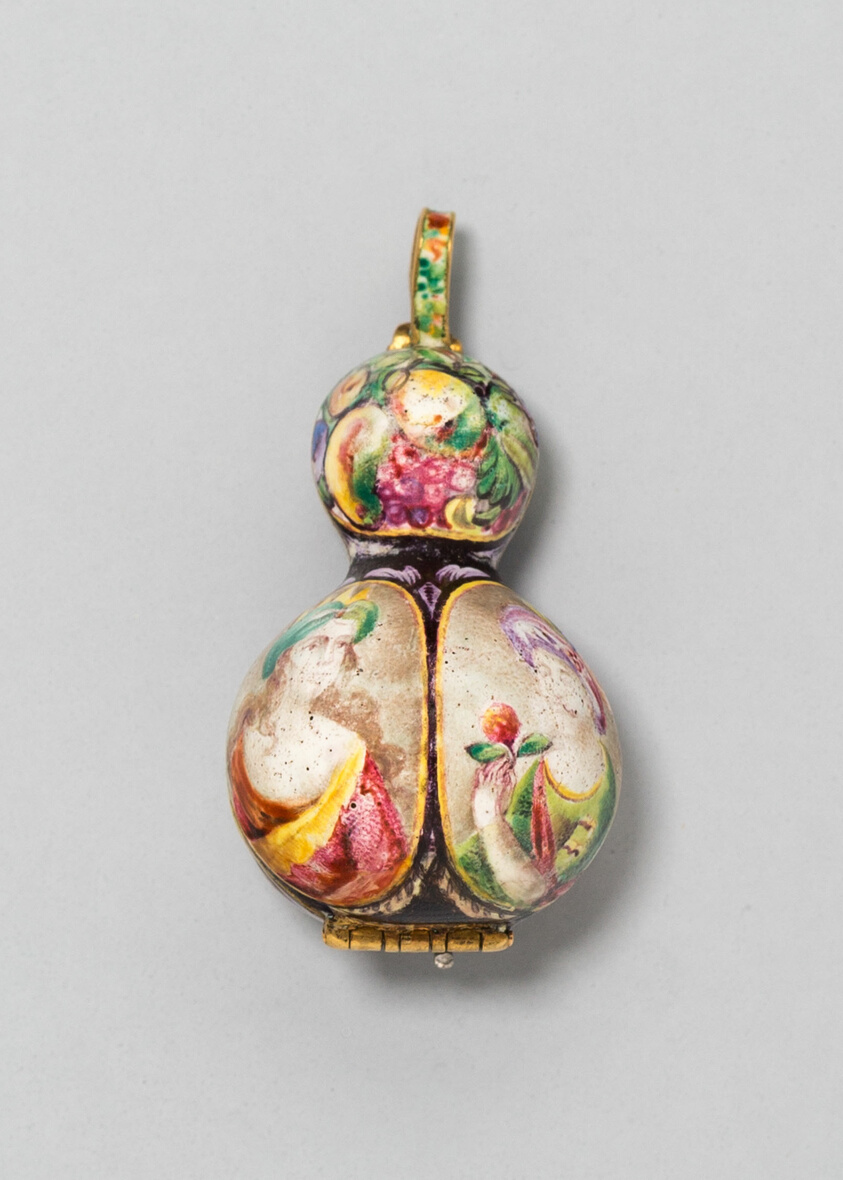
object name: Costume and Accessories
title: Pomander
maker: French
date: c. 1650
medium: Gold and enamel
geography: France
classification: jewelry; european decorative arts; costume